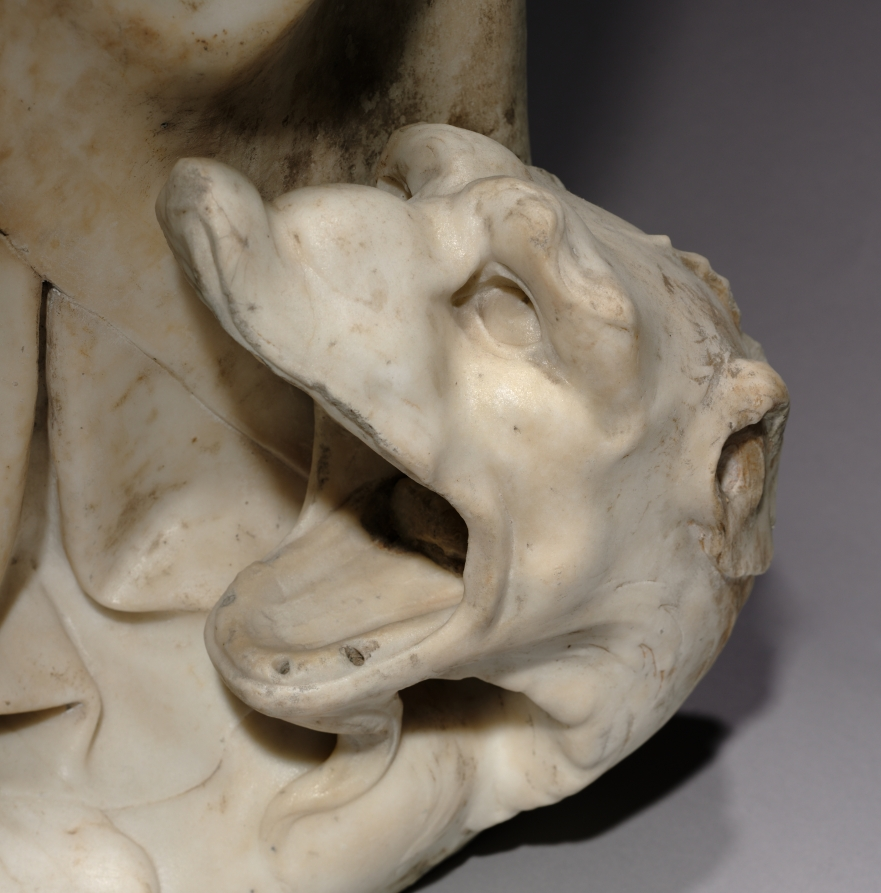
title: Saint Margaret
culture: Italy, Sicily, Palermo, 16th century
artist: Antonello Gaggini (Italian, 1478–1536)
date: c. 1520–1530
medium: marble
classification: Sculpture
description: Gaggini was a member of a large family of sculptors whose Palermo workshop supplied monumental religious sculptures for the cathedrals of Palermo and Messina in Sicily and Montelione in Calabria. After 1507 Antonello himself worked for 15 years to produce marble sculptures for Palermo Cathedral. This figure of the legendary virgin martyr, Saint Margaret, was probably commissioned for one of these ecclesiastical foundations, possibly the chancel of Palermo Cathedral. The saint is shown reading from a book of hours (a sign of her piety) and trampling upon a dragon, the symbol of Satan. The dragon became the attribute by which she is recognized in sacred art.